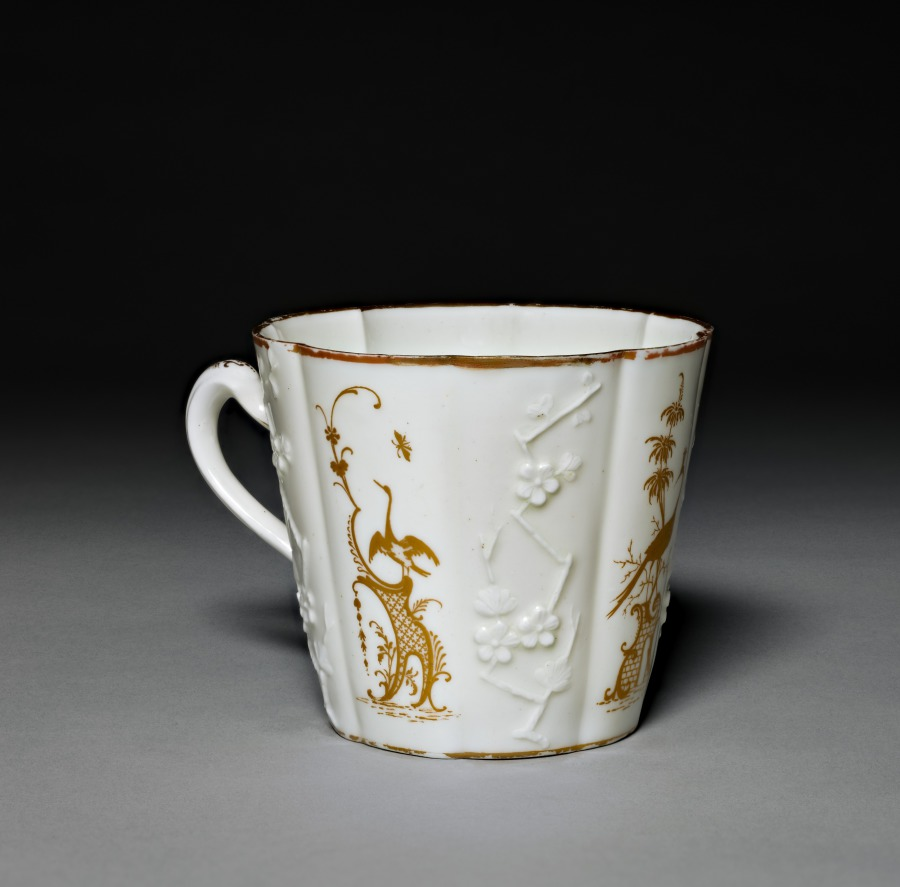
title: Cup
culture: France, Vincennes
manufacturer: Vincennes Porcelain Factory (France, 1740–56)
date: c. 1750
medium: soft-paste porcelain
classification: Ceramic